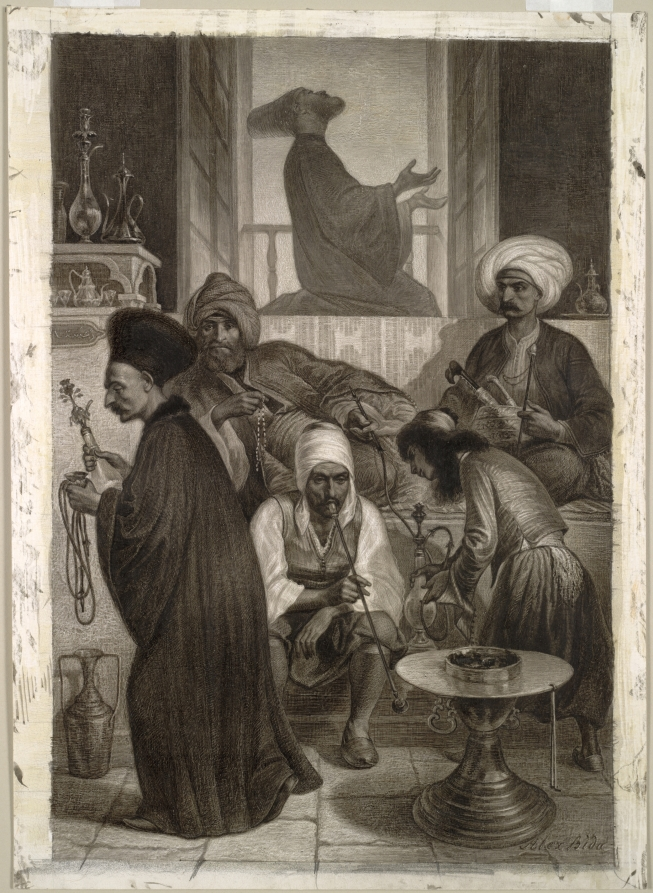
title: Café in Constantinople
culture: France, 19th century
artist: Alexandre Bida (French, 1823–1895)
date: 1847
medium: brush and black and gray ink, graphite, and stylus on white wove paper coated with a white ground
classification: Drawing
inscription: signed, lower right, in black ink and stylus: Alex Bida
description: This precise and carefully finished work reflects an unusual technique. Building up the entire area with ink and graphite over white chalk, Bida used a stylus to scratch a comprehensive network of tiny lines, providing highlights and picking out details. For his Orientalist subjects, Bida traveled repeatedly to the Near East-the first time in 1843 when he went to Constantinople and Syria from Venice. Although he closely observed the costumes and people encountered overseas, the decorative arrangements and symmetrical space in this draw-ing exemplify the theatrical aspects of Bida's art.